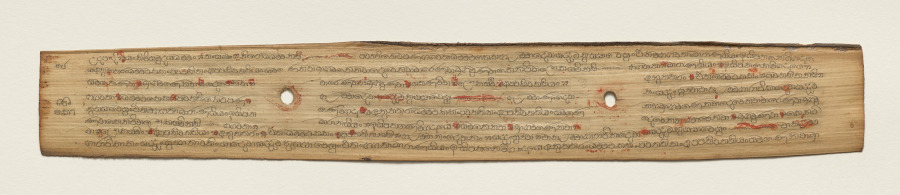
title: Leaf from a Buddhist Manuscript (recto)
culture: Sri Lanka, Singhalese, Late 17th century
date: c. 1700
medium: fiber paper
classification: Manuscript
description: Palm leaf material is still used for manuscripts in Sri Lanka. The palm leaves are prepared first by boiling them, drying them in the sun, and then rubbing them with oils. Scribes then use a metal stylus to incise the text. Then charcoal powder is wiped across the pages, filling in only the inscribed lines.